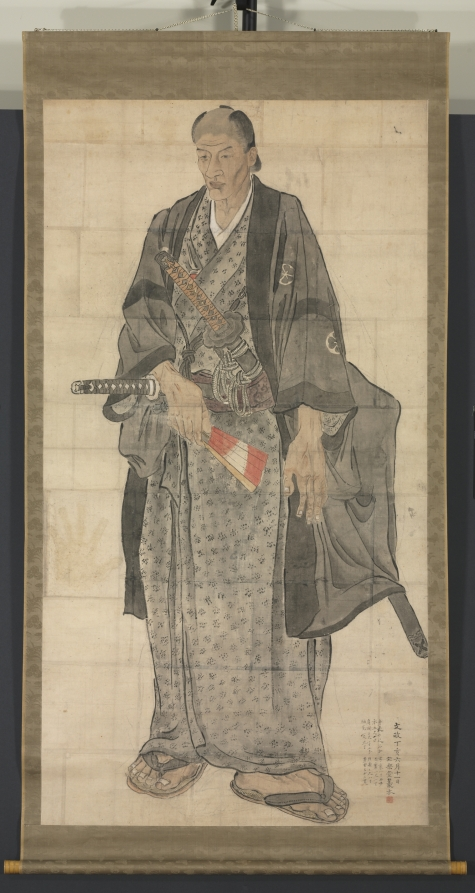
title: Portrait of Ōzora Buzaemon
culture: Japan, Edo period (1615–1868)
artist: Watanabe Kazan (Japanese, 1793–1841)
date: 1827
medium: hanging scroll; ink and color on paper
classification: Painting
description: Over seven feet tall, Ōzora Buzaemon became a tabloid sensation when he arrived in Edo (Tokyo) in 1827 . His handprints were cherished souvenirs, and his image was sold on woodblock prints. As inscriptions on the scroll detail, Watanabe Kazan met Buzaemon at the residence of a noted Confucian scholar. Using a camera obscura–type device—a tool that uses light to project an image onto a surface—he made this preliminary drawing for a painting. The portrayal depicts Buzaemon’s discomfort in being stared at.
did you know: Watanabe Kazan was interested in Rangaku (Dutch Learning).